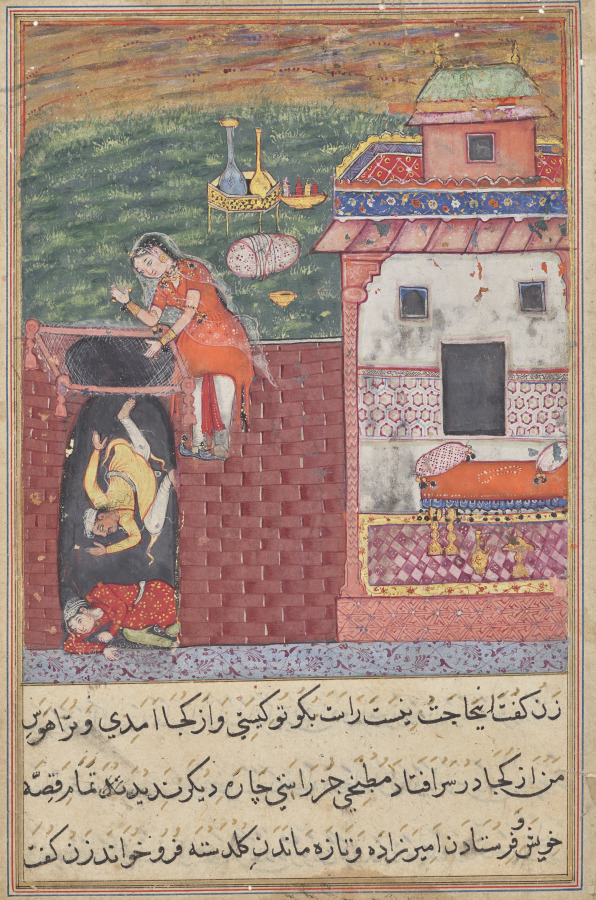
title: The two cooks, who attempt to seduce the warrior’s loyal wife, are trapped by her in a cellar, from a Tuti-nama (Tales of a Parrot): Fourth Night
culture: Mughal India, court of Akbar (reigned 1556–1605)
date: c. 1560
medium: gum tempera, ink, and gold on paper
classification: Painting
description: This story is about how wives who wish to be faithful will remain so, despite any seduction. This woman’s husband was a soldier, and when he was away on duty for months at a time, his master, the king, was intrigued at his wife’s faithfulness, proven by a magical rose garland that remained eternally fresh. The king wished to test her by sending his two handsome cooks to visit her and attempt to lure her into adultery. She tricked them into coming to her home and getting on a bed made of weak strings, positioned over a pit into which they fell. She kept them prisoner there until the king and her husband came to see what happened.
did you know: The cellar is represented in cross-section to reveal the scene inside.